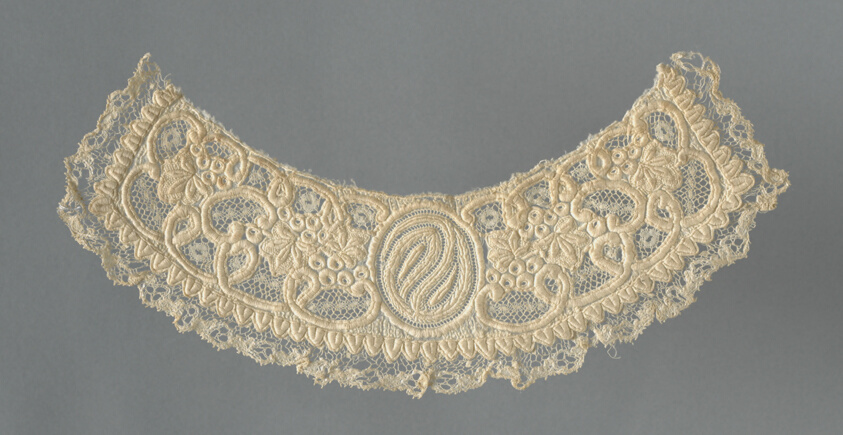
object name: Textile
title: Cuff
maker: England or France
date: 1850/75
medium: Cotton, plain weave; cut and drawn work embroidered in buttonhole, eyelet, hem and overcast stitches; embroidered in back, buttonhole, overcast, and padded satin stitches; insertions of cotton, bobbin straight lace of a type known as "Valenciennes"; edged with cotton and linen, bobbin straight lace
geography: England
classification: textile; needlework (visual works)